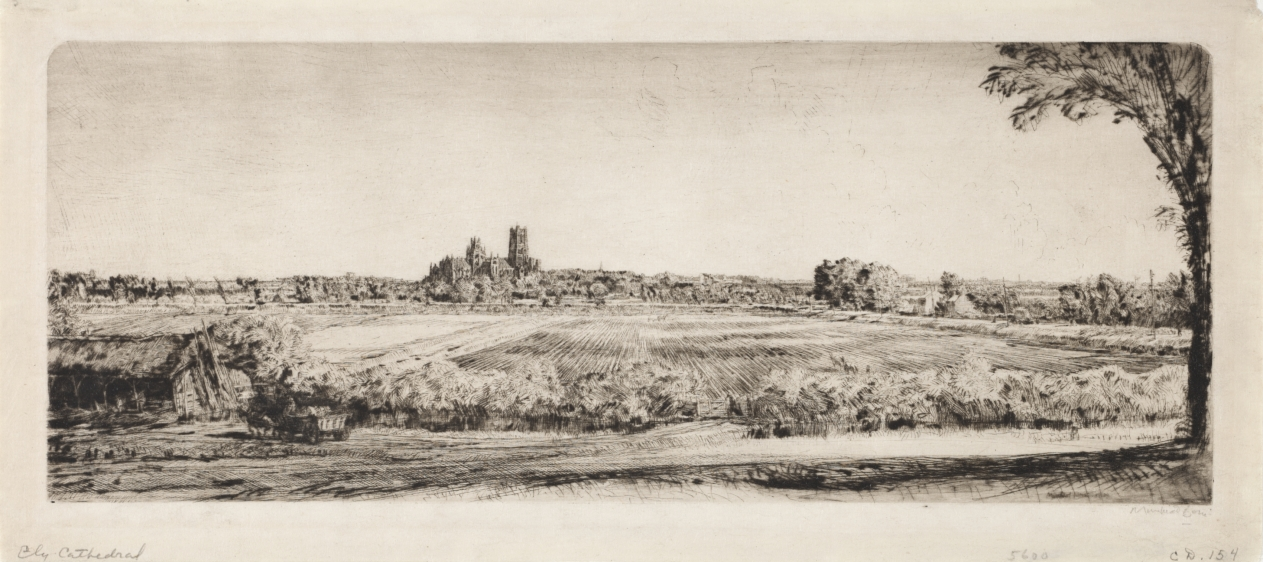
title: Ely Cathedral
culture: England, 20th century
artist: Muirhead Bone (British, 1876–1953)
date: 1903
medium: drypoint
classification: Print